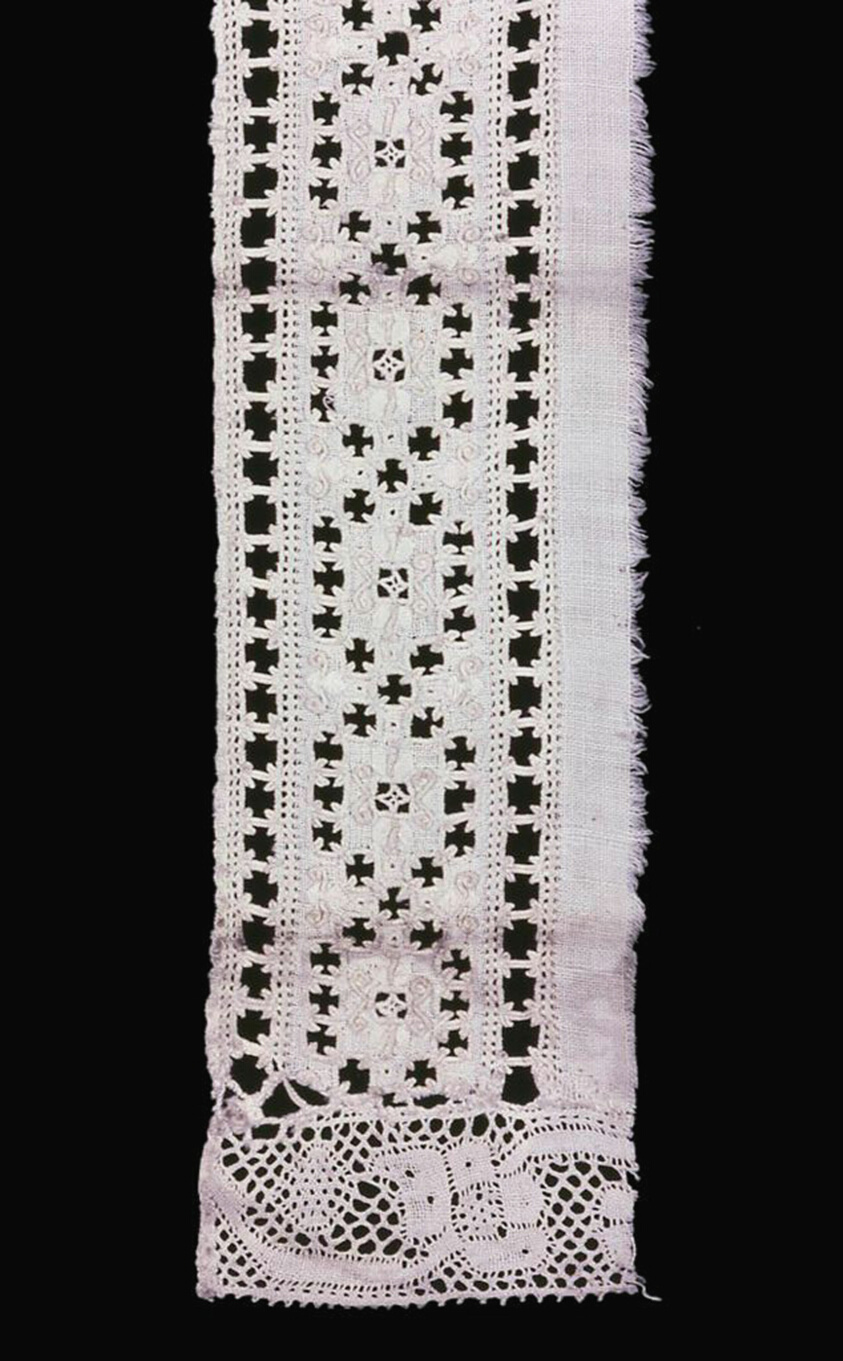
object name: Textile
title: Border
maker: Italy (straight lace: Flanders)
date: 1575/1625 (straight lace: 1701/50)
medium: Linen, plain weave; cut and drawn work embroidered in interlocking lace and overcast stitches; darned bars and woven picots; embroidered in Italian hem, overcast back, overcast, and satin stitches; eyelet holes; edged with bobbin straight lace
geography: Italy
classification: textile; lace - needle; needlework (visual works); lace